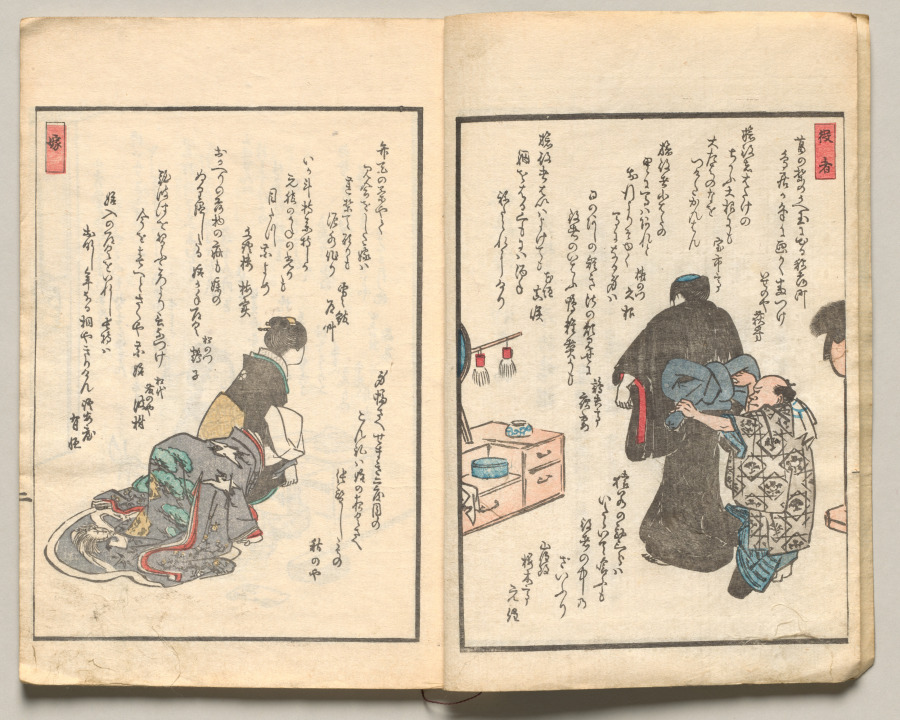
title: Spread Two from Volume Five of People of Japan in Light Verse (Kyōka)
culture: Japan, Edo period (1615–1868)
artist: Utagawa Hiroshige (Japanese, 1797–1858)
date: 1857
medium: Woodblock-printed book; ink and color on paper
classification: Bound Volume